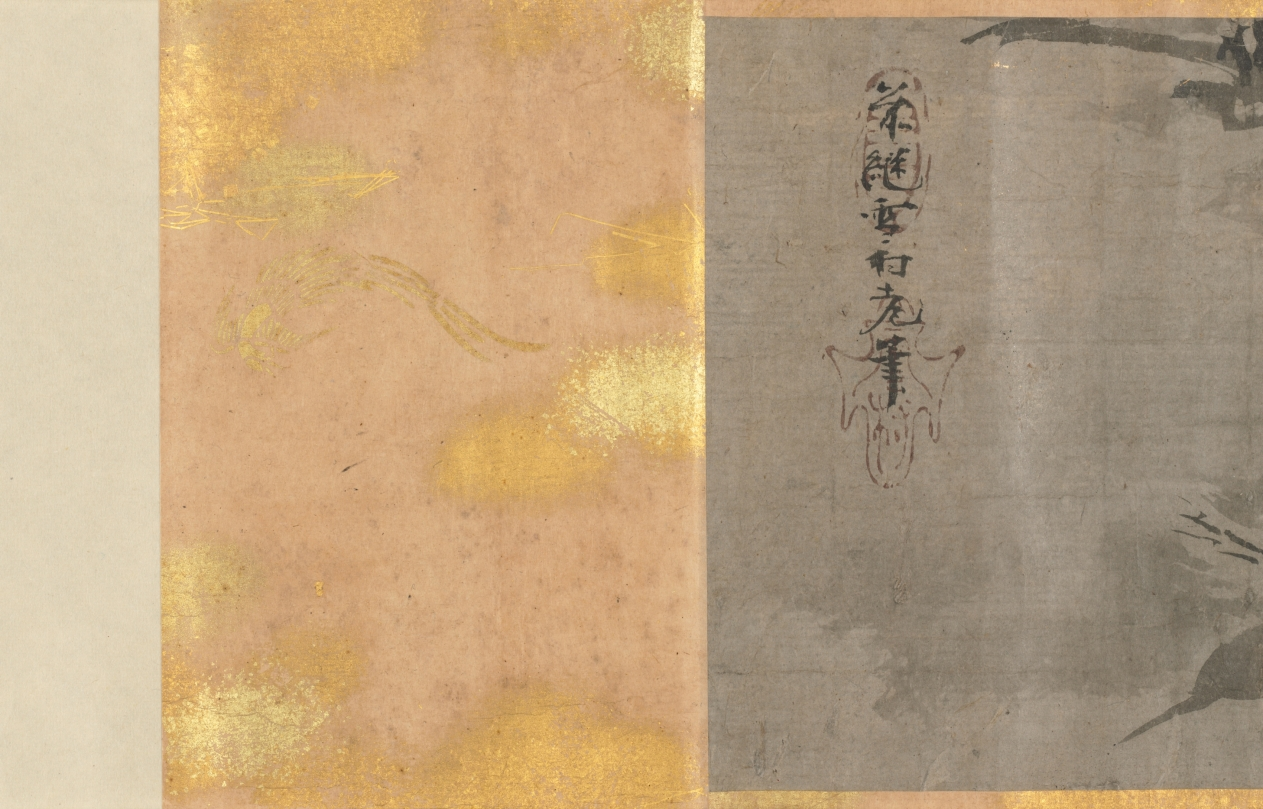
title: Eight Views of Xiao-Xiang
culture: Japan, Muromachi period (1392–1573)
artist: Sesson Shūkei (Japanese, c. 1492–c. 1577)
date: 1500s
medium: handscroll; ink on paper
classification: Painting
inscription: Signature and seal of artist at end of painting.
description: Eight Views of the Xiao and Xiang Rivers can be traced to 11th-century Chinese poems and paintings, the depiction of which had also become popular among Korean and Japanese painters. Xiao-Xiang refers to the region in present-day Hunan province where the Xiao and Xiang rivers converge. Few painters of the Eight Views had in fact seen the scenery; rather, they were trying to portray in ink and wash the lyrical qualities of dim light and a misty atmosphere typical of that region. Each of the poetic titles suggests a time of day, a season, or specific atmospheric conditions—subjects that challenged the abilities of the most talented artists. In this miniature painting (shukuzu) of the Muromachi period, Japanese Zen monk and painter Shukei Sesson depicted all eight views featured in Chinese prototypes: Wild Geese Descending to Sandbar; Returning Sails Off a Distant Coast; Mountain Market in Clearing Mist; River and Sky in Evening Snow; Autumn Moon over Dongting Lake; Night Rain on the Xiao and Xiang; Evening Bell from Mist-Shrouded Temple; and Fishing Village in Evening Glow.